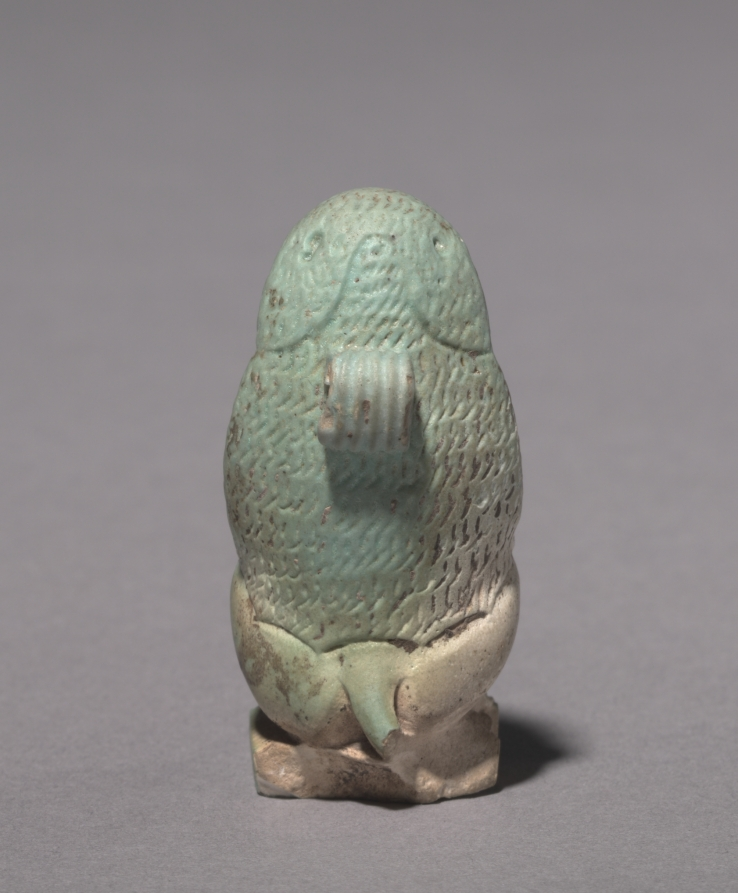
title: Thoth as Baboon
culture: Egypt, Late period (715–332 BCE), Dynasty 26–Greco-Roman period (332 BCE–395 CE), Ptolemaic dynasty (305–30 BCE)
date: 664–305 BCE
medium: pale turquoise faience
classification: Amulets